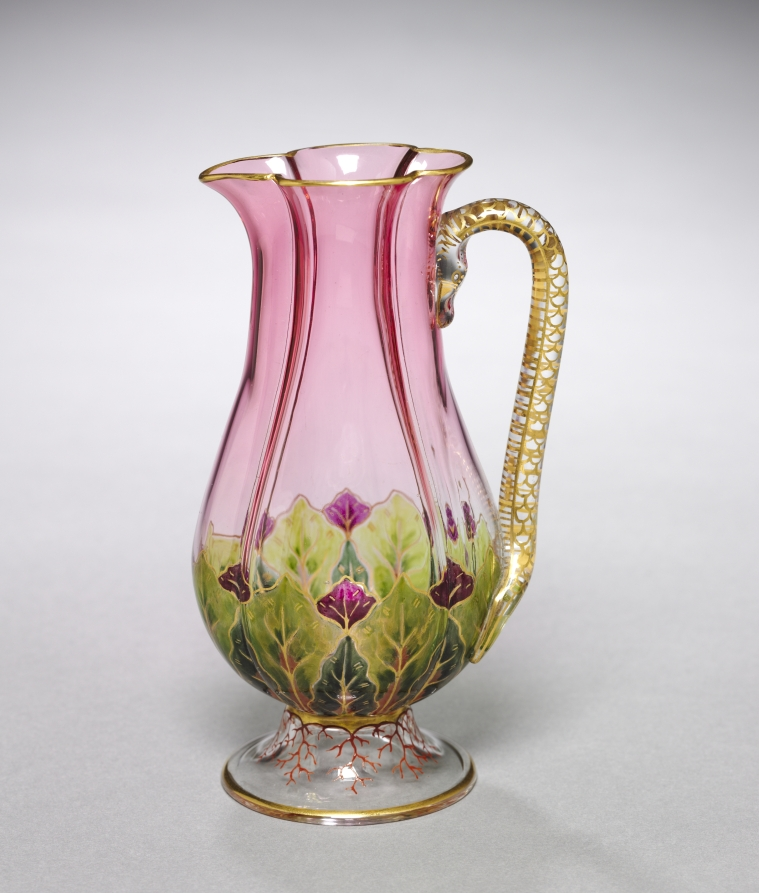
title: Pitcher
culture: Austria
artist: J. & L. Lobmeyr (Austrian, Vienna, est. 1823)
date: 1800s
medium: enameled and gilded glass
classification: Glass